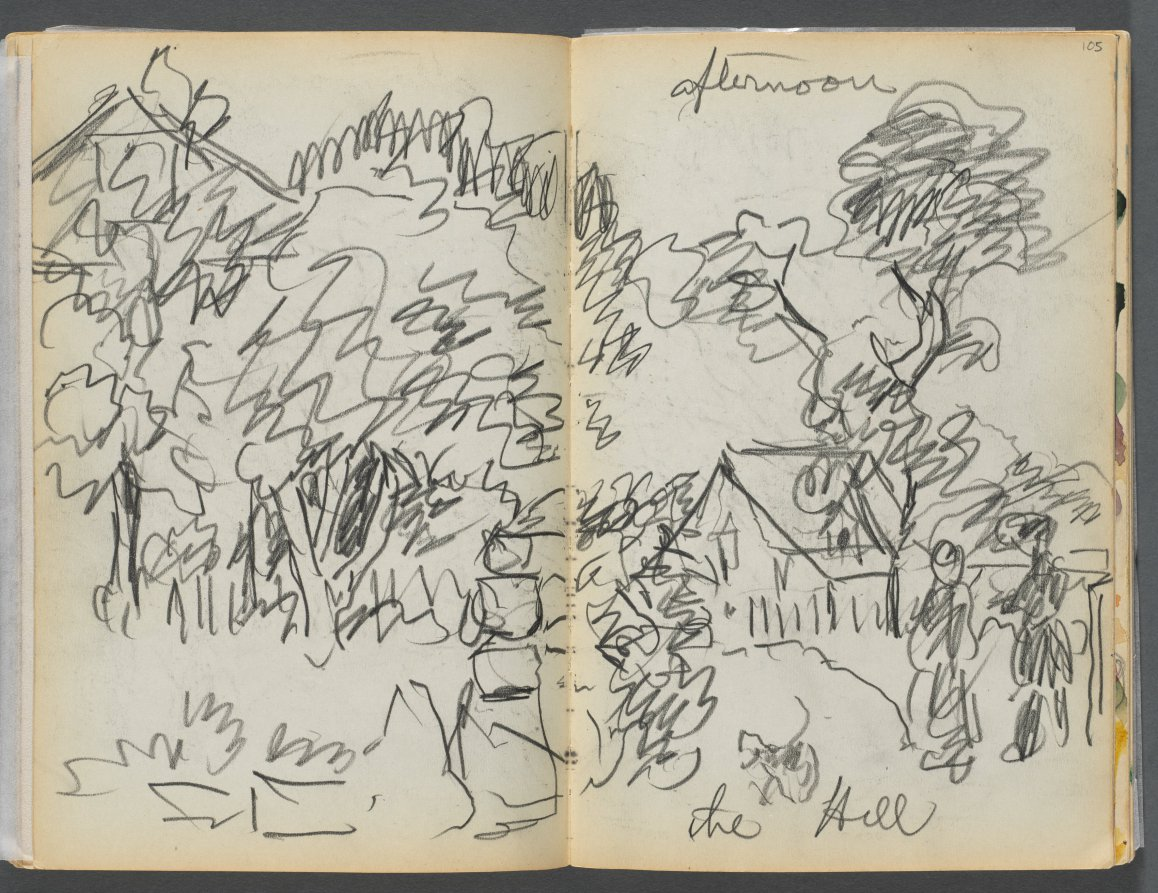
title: Sketchbook- The Granite Shore Hotel, Rockport, page 104- 105: "Afternoon , the hill"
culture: America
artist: Maurice Prendergast (American, born Newfoundland [now Canada], 1858–1924)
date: 1905–10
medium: graphite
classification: Bound Volume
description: This sketchbook contains 72 pages of pencil drawings and 9 watercolors of Cape Ann. On the inside of the cover Prendergast wrote the address of the Granite Shore Hotel in Rockport, Massachusetts.